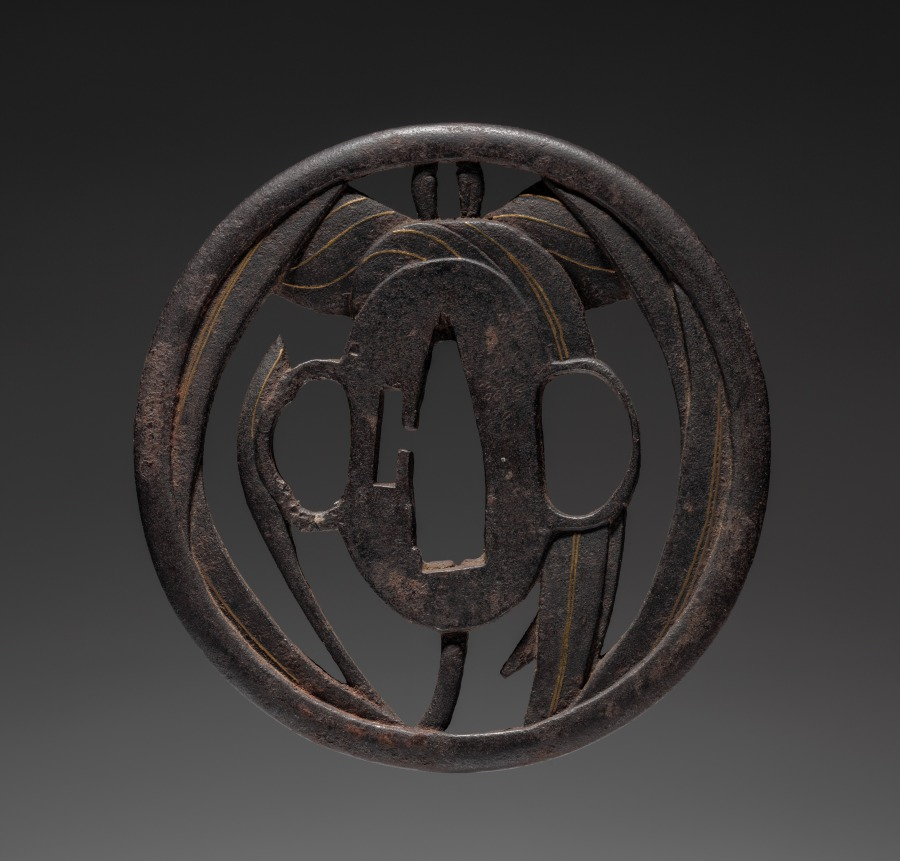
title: Sword Guard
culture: Japan, Edo period (1615–1868)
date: 1615–1868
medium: iron (Chosu type)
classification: Arms and Armor